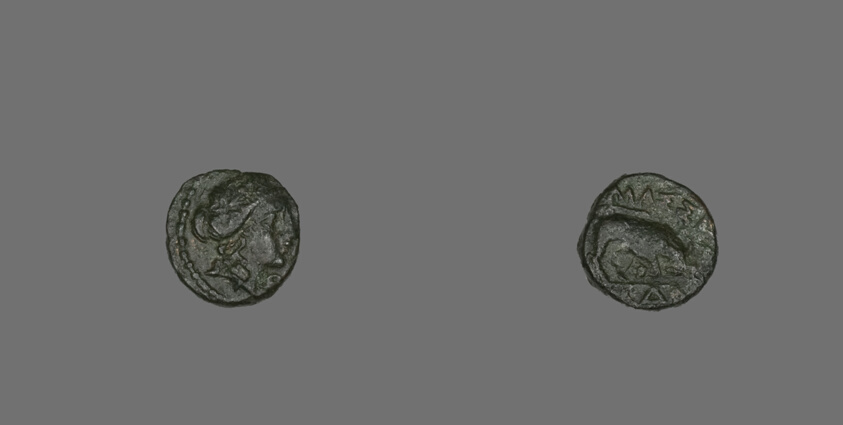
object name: Coin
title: Coin Depicting the God Apollo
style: greek, ancient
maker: Greek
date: after 250 BCE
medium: Bronze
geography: Greece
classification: coin; ancient art; struck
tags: gods (deities), bull